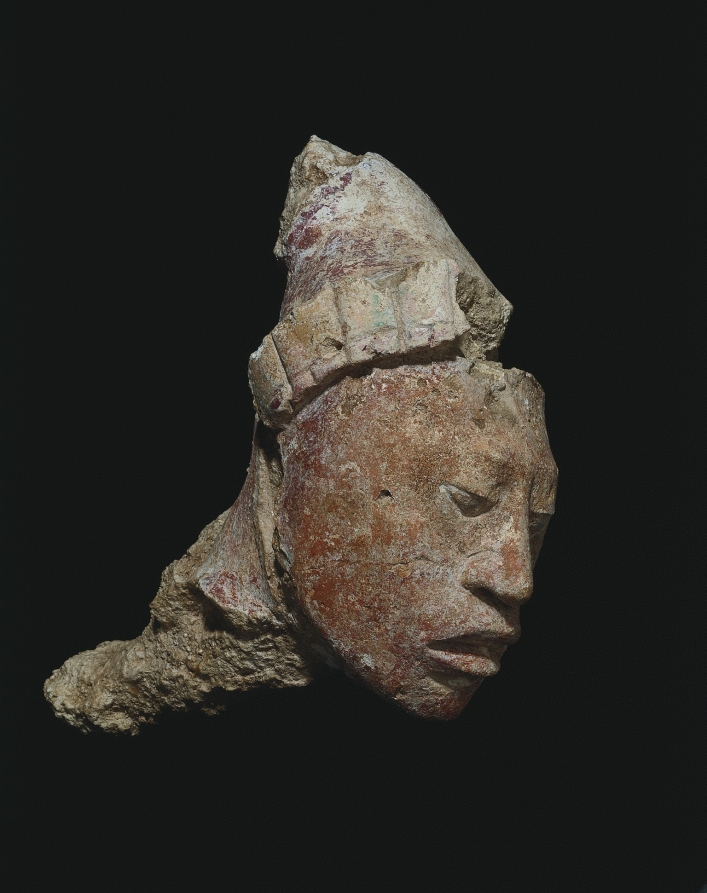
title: Head from a Building's Façade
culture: Mexico, Campeche, Maya style (250-900)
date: 250–900 CE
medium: stucco, paint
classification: Sculpture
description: The Maya often lavishly decorated the exteriors of buildings, transforming them into elaborate sculptural works in their own right. This sensitively modeled head, made from fragile stucco, would have been affixed to the façade of a palace or temple via the tenon (projection) at the back of the head. The rest of the body may have been modeled separately.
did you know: Maya elites practiced cranial modification on infants to achieve the sloped profile seen in this tenoned head.